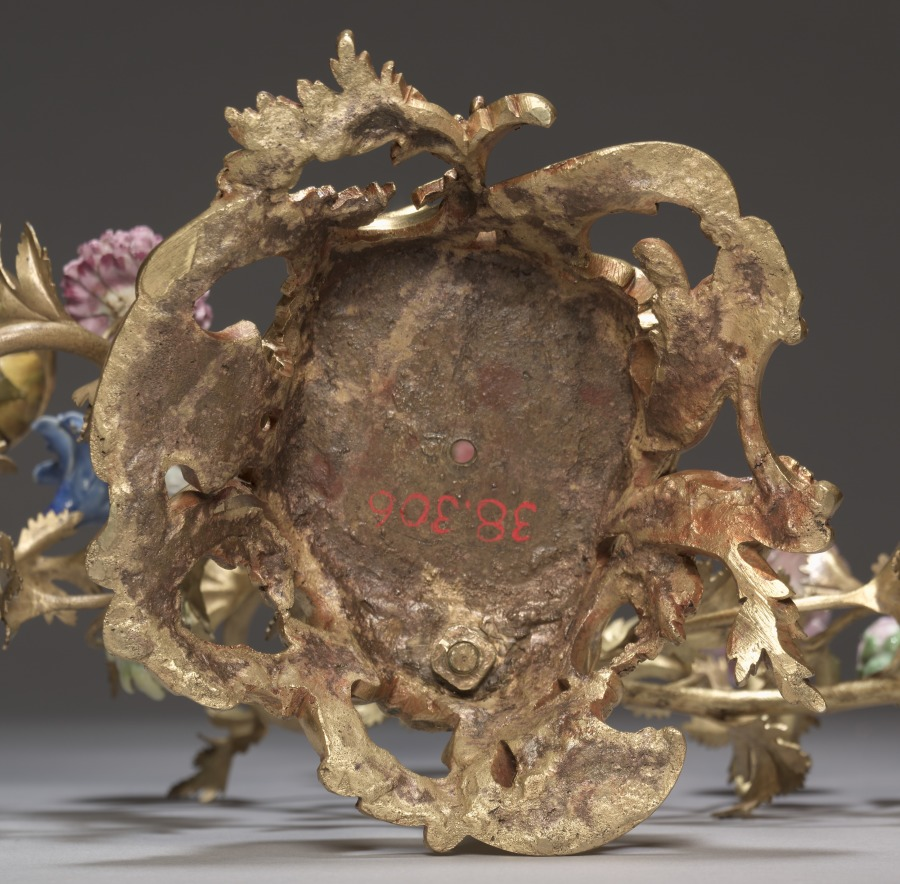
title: Candelabrum with Parrot (Candelabrum)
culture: France, style of Louis XV, 18th century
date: c. 1750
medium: gilt bronze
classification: Furniture and woodwork